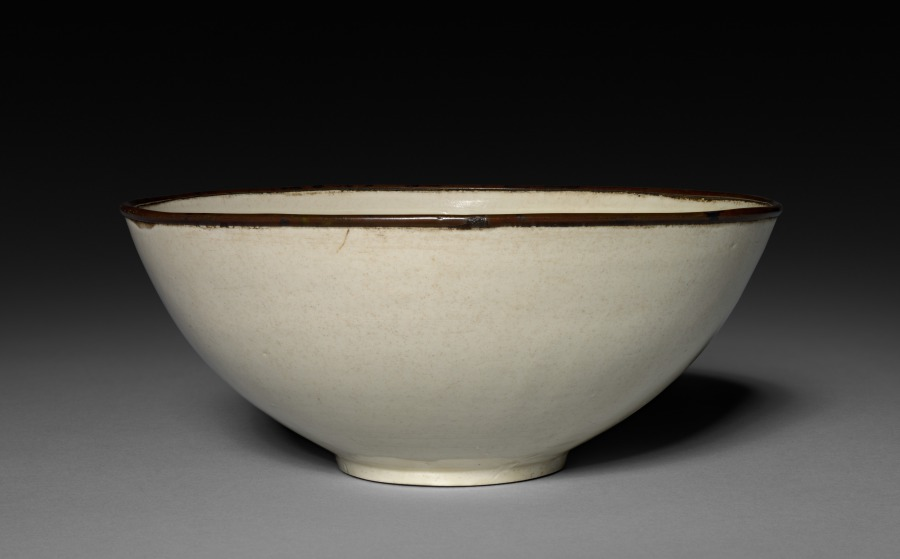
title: Bowl: Ding ware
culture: China, Jin dynasty (1115-1234)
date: 12th-13th Century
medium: glazed white porcelain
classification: Ceramic